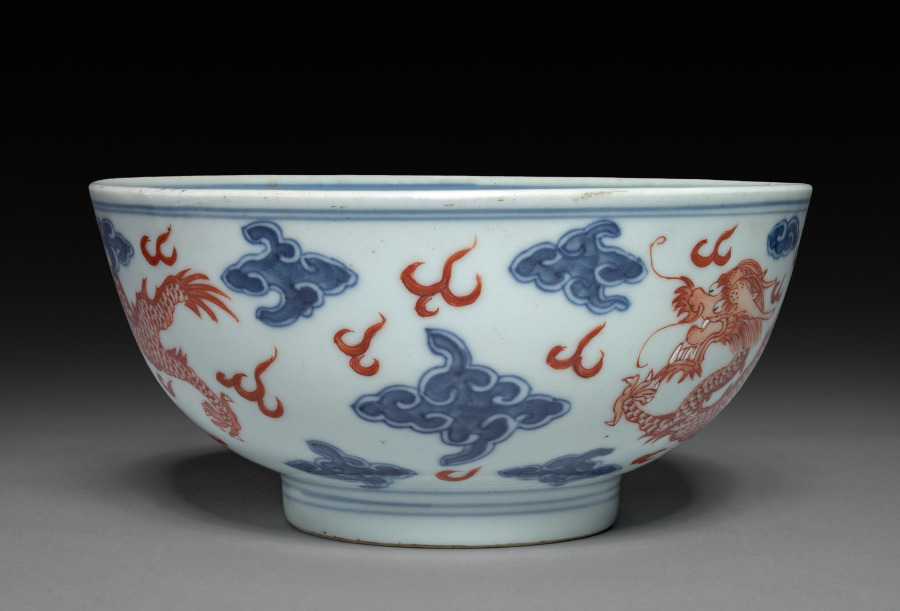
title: Bowl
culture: China, Qing dynasty (1644-1911), Qianlong mark and reign (1736-95)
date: 1736–95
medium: porcelain with overglaze red and underglaze blue enamel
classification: Ceramic